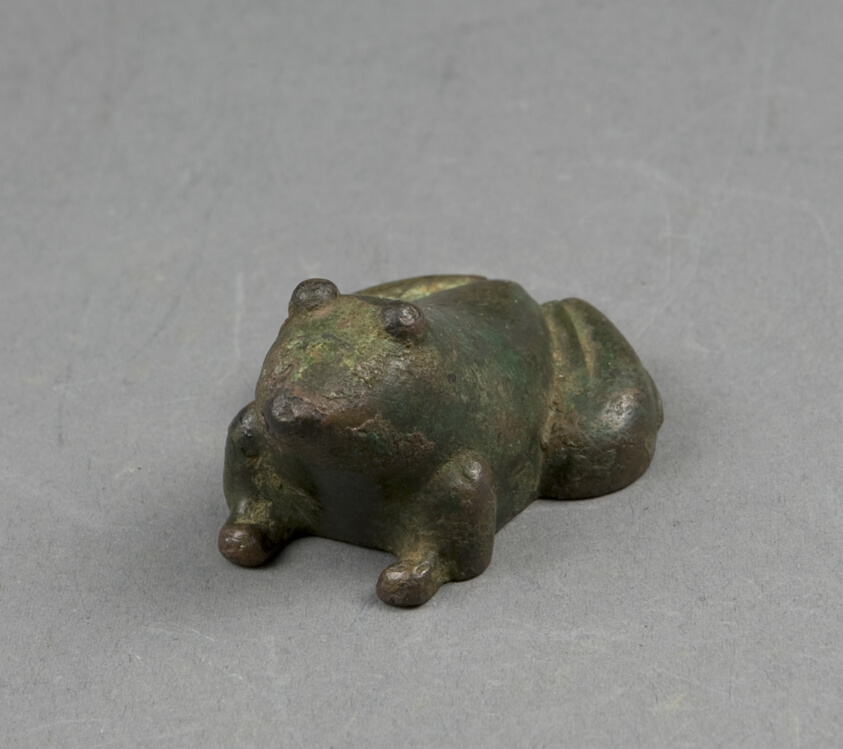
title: Seated Frog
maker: China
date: Han dynasty (206BCE-220CE)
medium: Bronze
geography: China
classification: bronze; metal; decorative object/ornament; asian art